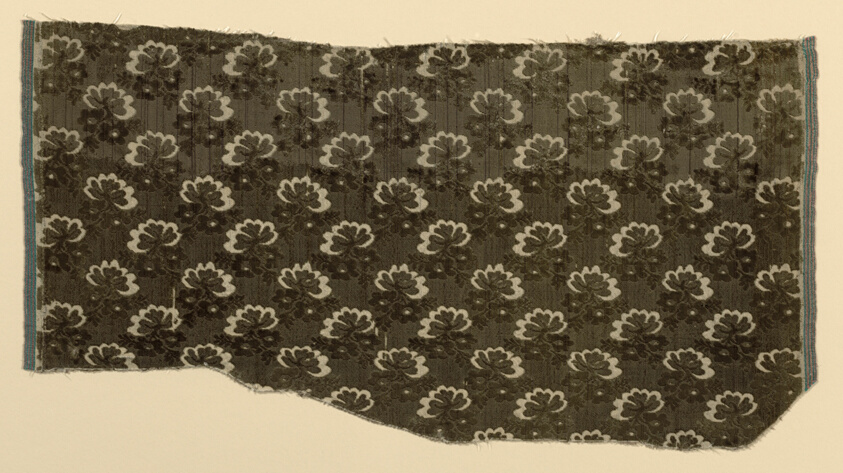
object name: Textile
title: Fragment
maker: France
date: 18th century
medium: Silk, cut, uncut, voided velvet against satin weave foundation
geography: France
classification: textile; weaving - velvet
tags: fashion